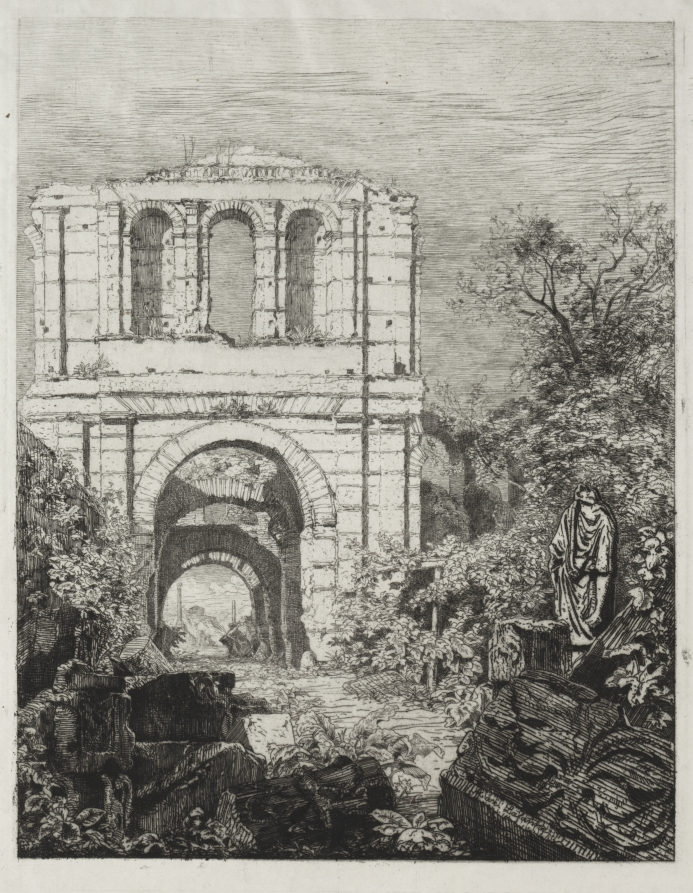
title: Ruins of the Palais Gallien in Bordeaux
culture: France, 19th century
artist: Maxime Lalanne (French, 1827–1886)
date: 1866–74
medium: etching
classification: Print